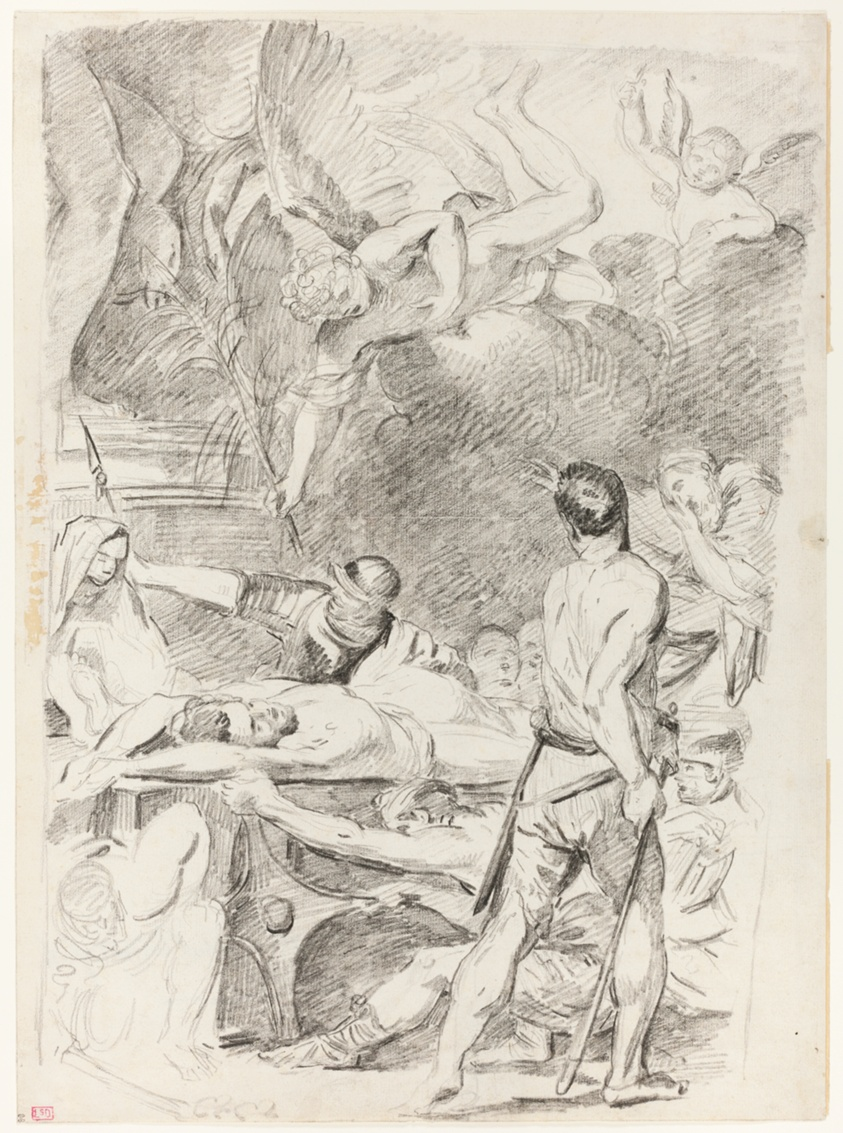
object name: Drawing and Watercolor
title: Martyrdom of Saints Processus and Martinian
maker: Jean Bernard Restout (French, 1732-1797); after Valentin de Boulogne (French, 1594-1632)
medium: Black crayon, on ivory laid paper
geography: France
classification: chalk; drawings (visual works); prints and drawing